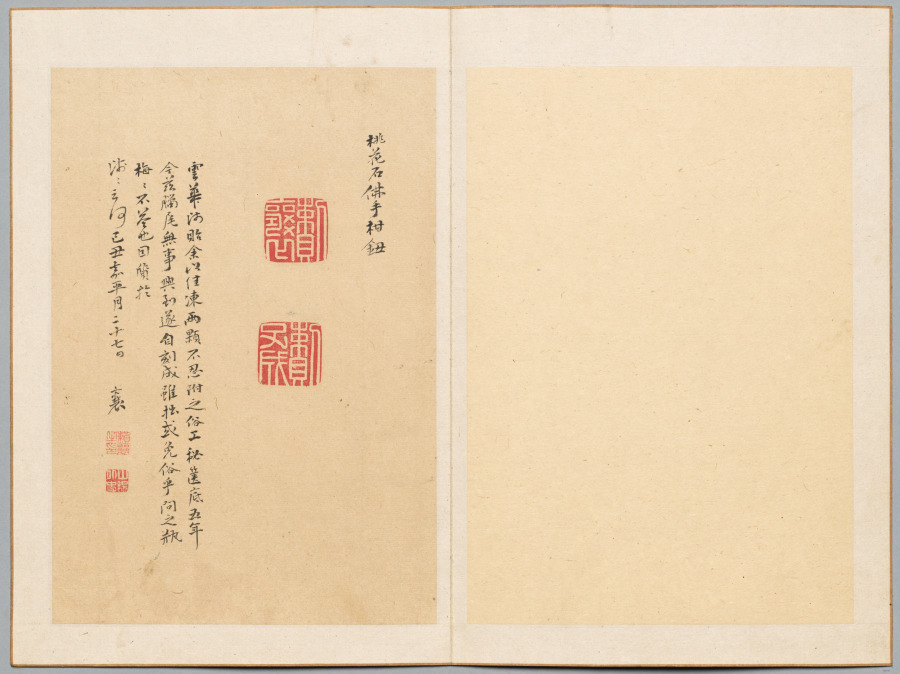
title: Inscription and Two Seals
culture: Japan, Edo period (1615–1868)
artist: Rai Sanyō (Japanese, 1780–1832)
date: 1829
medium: leaf from a pair of folding albums; ink on paper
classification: Portfolio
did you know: Rai Sanyō, author of a major history of Japan, died from tuberculosis while writing at his desk. A decidedly not fun fact.